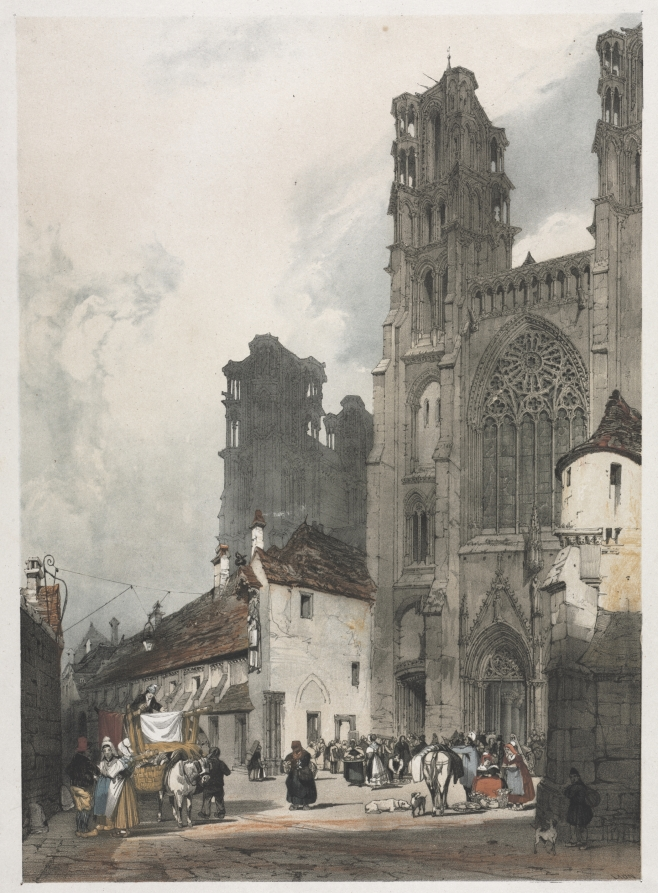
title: Picturesque Architecture in Paris, Ghent, Antwerp, Rouen: Laon, France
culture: England, 19th century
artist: Thomas Shotter Boys (British, 1803–1874)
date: 1839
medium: lithograph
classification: Portfolio